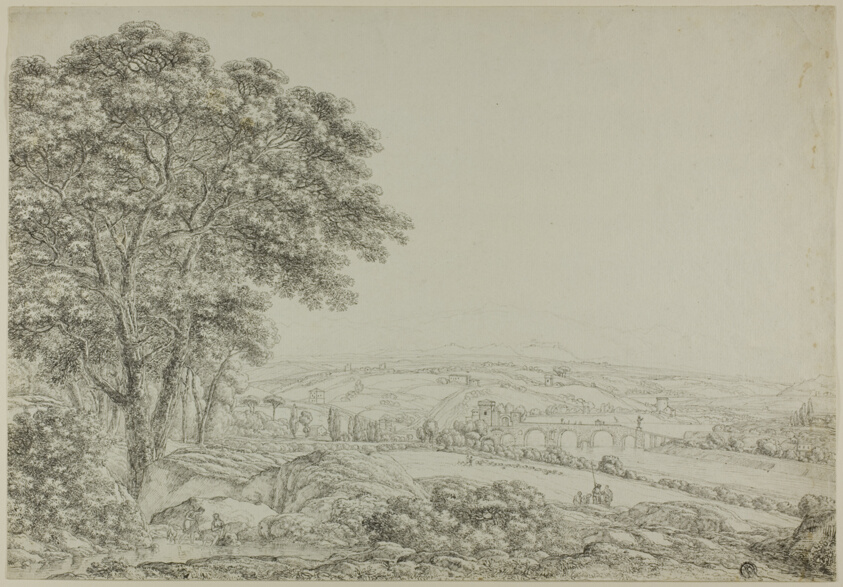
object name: Drawing and Watercolor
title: Wooded Pond with Bathing Figures, Vista of River Bridge, and Farms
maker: Possibly Wilhelm Alexander Wolfgang von Kobell; German, 1766-1855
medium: Pen and black ink over graphite, on ivory laid paper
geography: Germany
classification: pen and ink drawings; drawings (visual works); prints and drawing